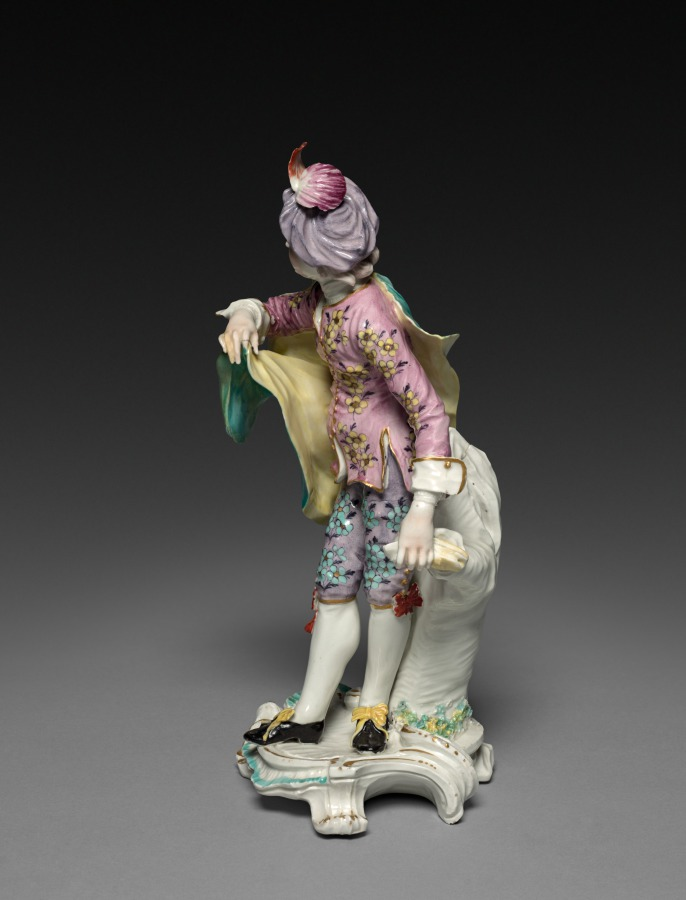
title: Dancer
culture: England, Derby, 18th century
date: c. 1760–1765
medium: soft-paste porcelain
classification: Ceramic